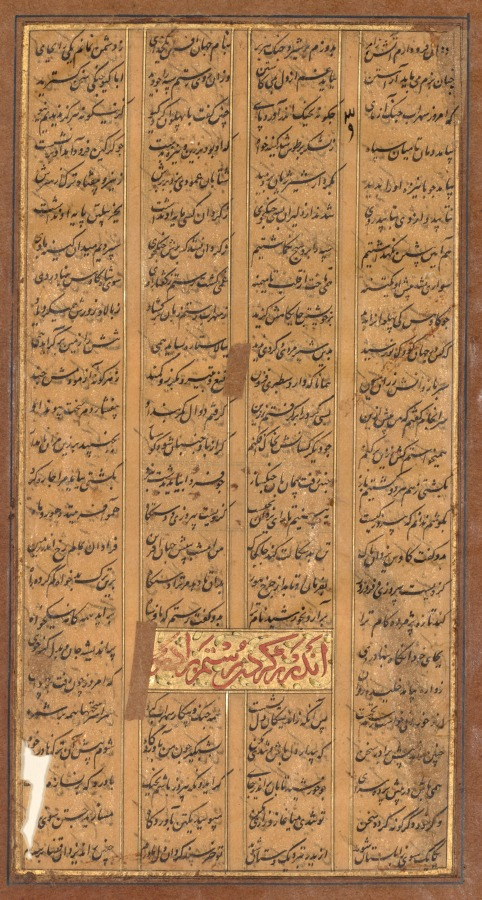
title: Text of Rustam and Suhrab, from the Shah-nama of Firdausi (Persian, c. 934–1020) (recto)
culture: India, Bijapur, Deccan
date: c. 1610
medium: Gum tempera, ink, and gold on paper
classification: Painting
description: This page of text from the jewel-like copy of the Shah-nama made in the southern Indian city of Bijapur describes the events leading to Rustam’s accidental slaying of his own son Suhrab. The larger text in red is a chapter heading, which reads: “The single combat between Rustam and Suhrab once more.”